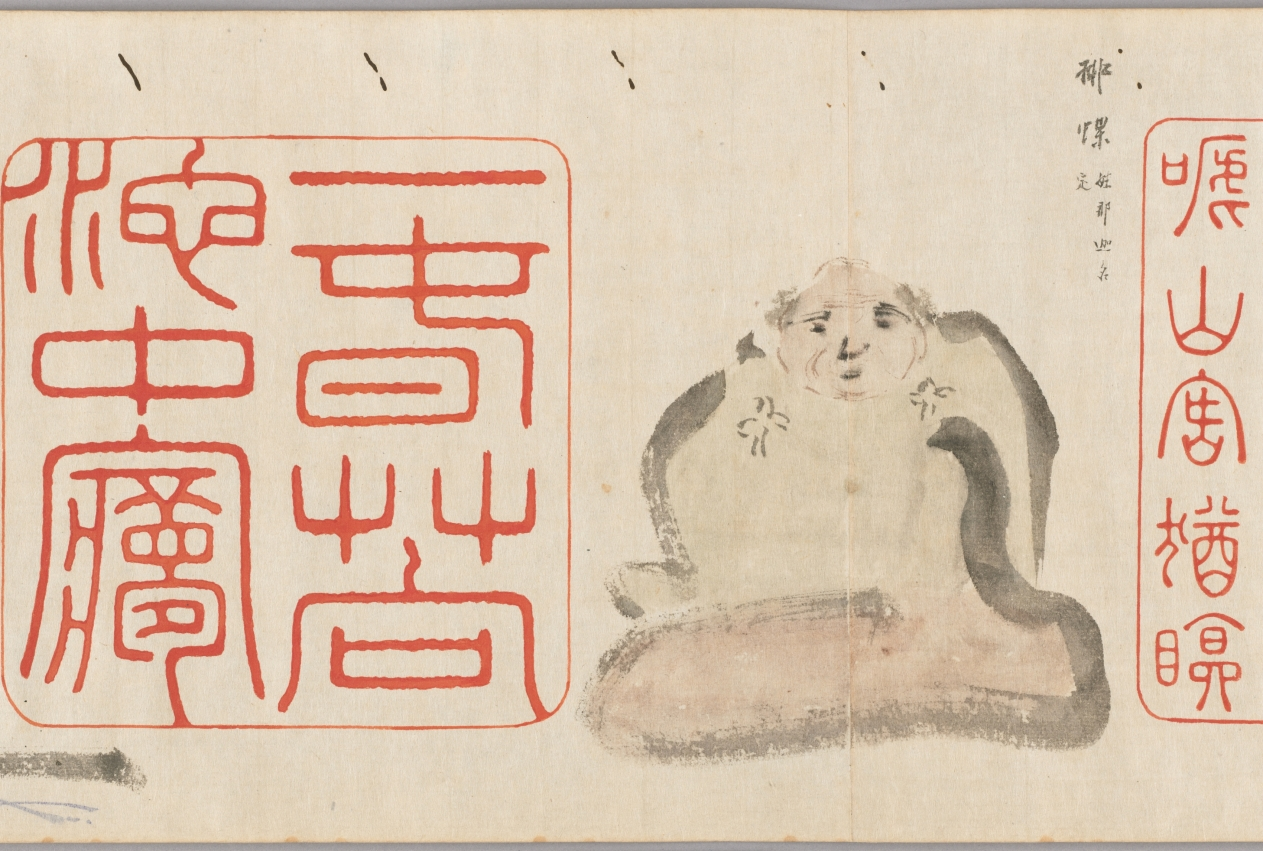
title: Chinese Seals and Poets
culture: Japan, Edo period (1615–1868)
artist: Hosokawa Rinkoku (Japanese, 1779–1843)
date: 1842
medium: handscroll; ink and color on paper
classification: Painting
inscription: Eight seal impressions are painted in red and alternate with sketchily painted figures. Artist's colophon at end of scroll.